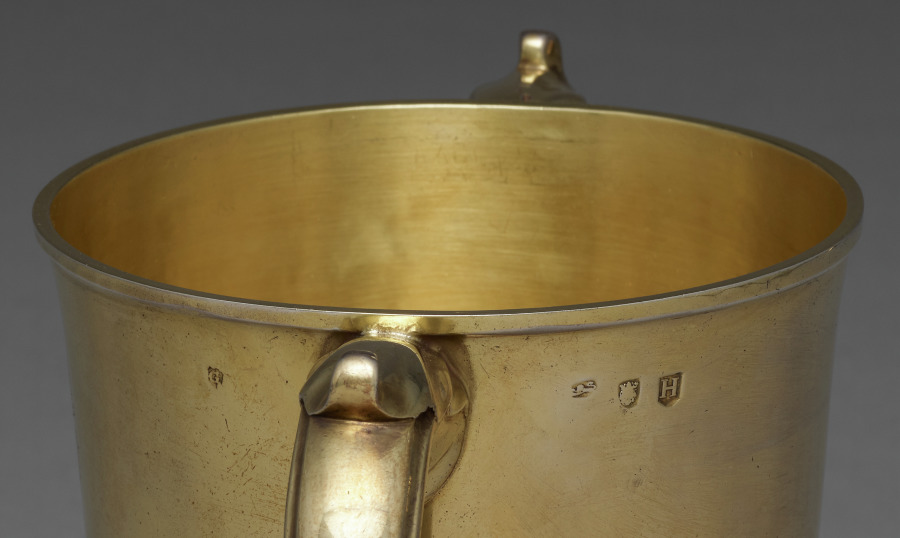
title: Covered Cup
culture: England, London, 18th century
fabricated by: Gabriel Sleath (British, 1674–1756)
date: 1723–1724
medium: silver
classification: Silver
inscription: engraved in the center of the cup is a demi-lion, rampant passant, holding an unknown object on an irregularly shaped shield surrounded by baroque manteling. In style, it is appropriate for date of cup but does not appear a true coat of arms. On the cover is a crest consisting of a demi-lion, rampant passant, between open buffalo horns. These heraldic devices perhaps refer to some entity rather than an individual.